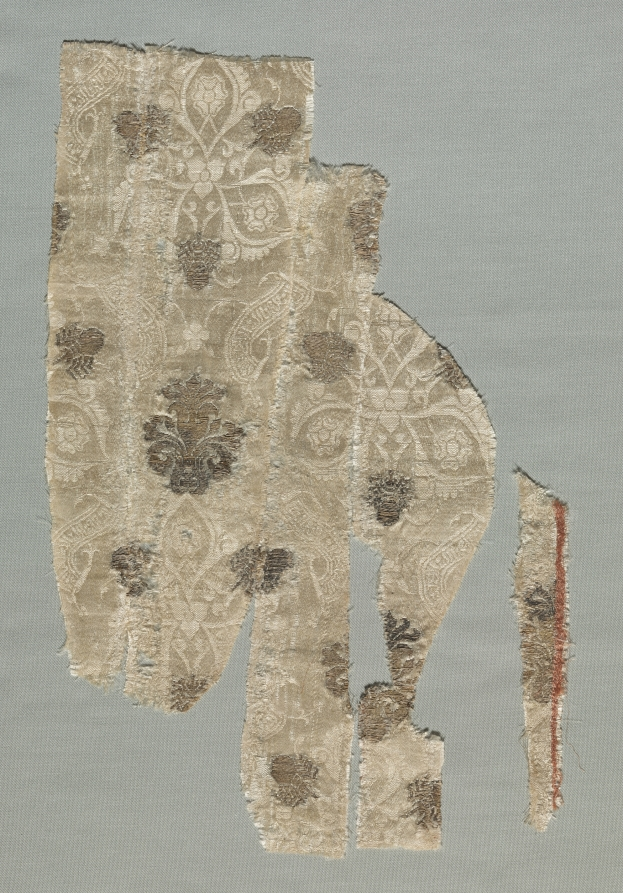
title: Silk Fragment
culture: Italy, second half of 14th century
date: 1350–1399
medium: lampas weave, brocaded; silk and Cyprian gold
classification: Textile